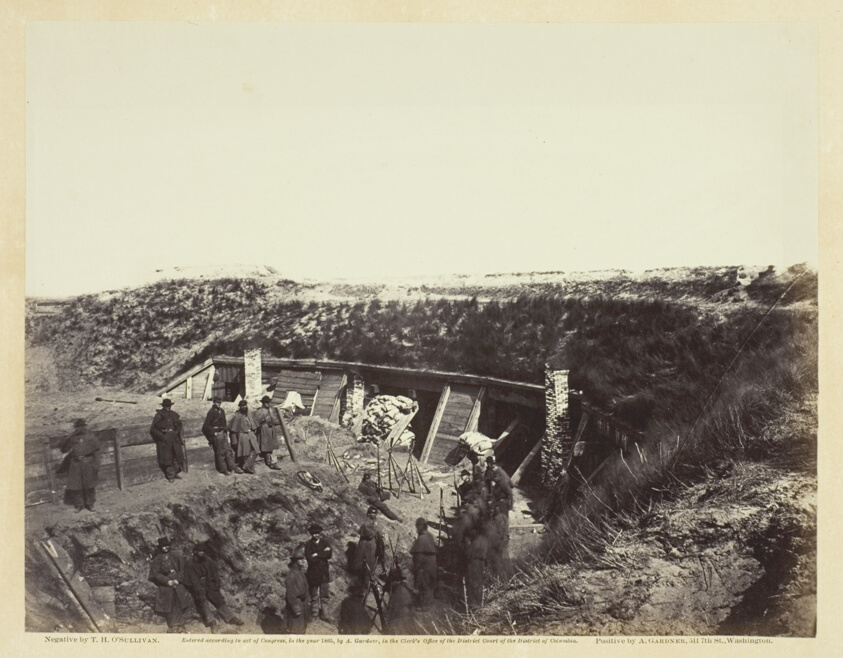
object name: Photograph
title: The Pulpit, Fort Fisher, N.C.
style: 19th century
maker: Timothy O'Sullivan (American, born Ireland, 1840–1882)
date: January 1865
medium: Albumen print, pl. 79 from the album "Gardner's Photographic Sketch Book of the War, Volume II" (1866)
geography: United States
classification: photograph; albumen silver print; photography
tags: Collected by Hugh Edwards, Gardner's Photographic Sketch Book